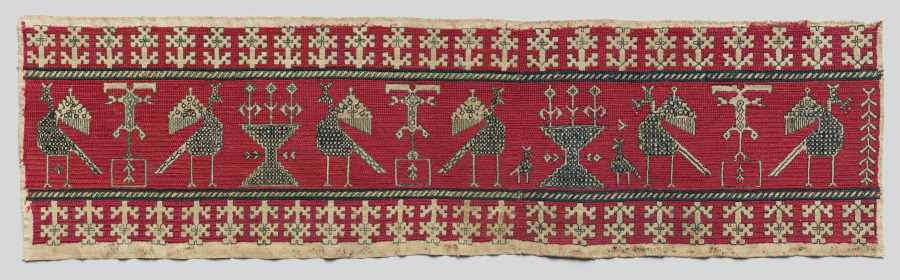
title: Fragment of a furnishing textile (one of five)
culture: Africa, North Africa, Morocco, Azemmour, Moroccan embroiderer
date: 1700s–1800s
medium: Linen, silk, dye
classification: Embroidery